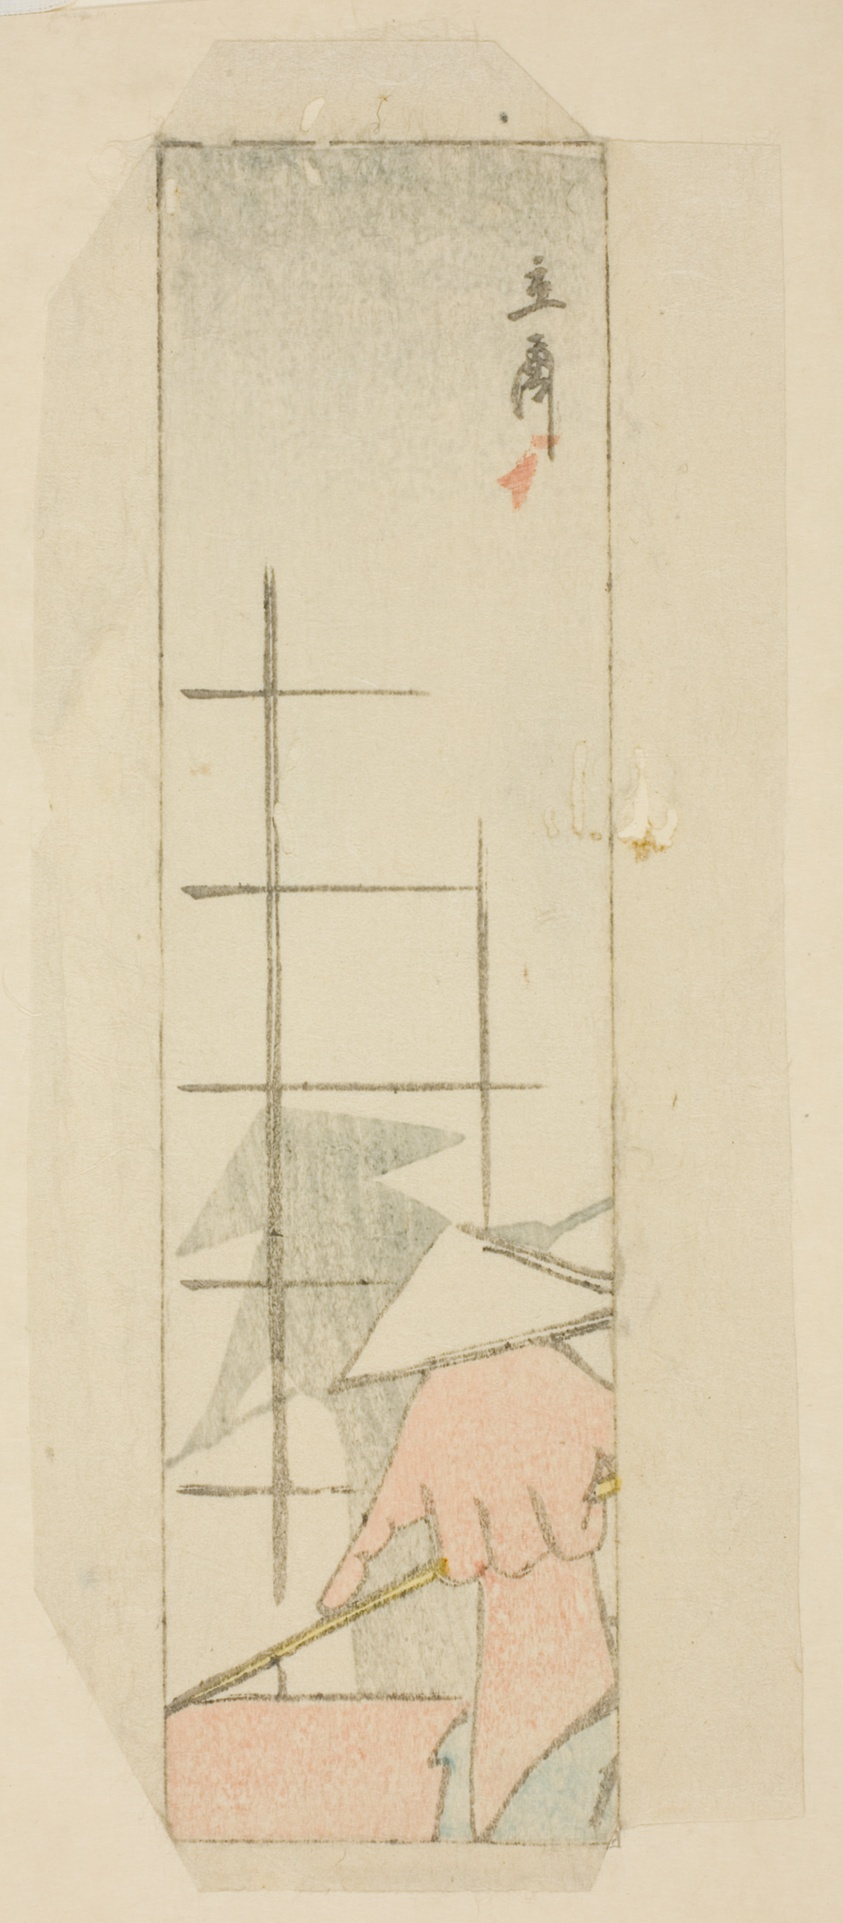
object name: Print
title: Envelope with hand shadow of boatman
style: Japanese (culture or style)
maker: Utagawa Hiroshige 歌川 広重; Japanese, 1797-1858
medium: Color woodblock print; envelope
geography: Japan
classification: woodblock print; print; asian art